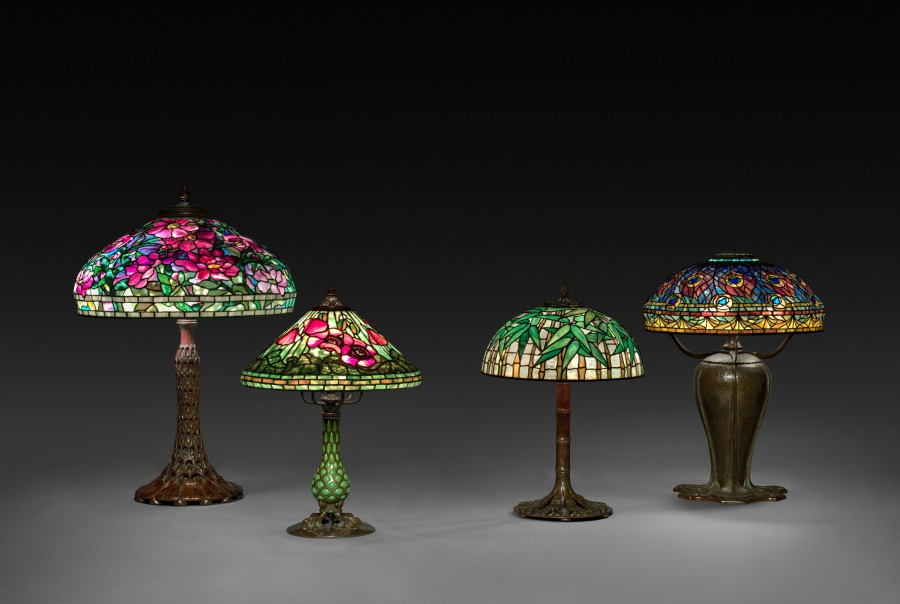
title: Poppy Filigree Table Lamp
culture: America, New York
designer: probably by Clara Wolcott Driscoll (American, 1861–1944)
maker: Tiffany Studios (United States, New York, 1902–32)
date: c.1902–10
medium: Leaded glass, blown glass, brass, bronze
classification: Lamp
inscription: Shade impressed: TIFFANY STUDIOS/NEW YORK/1431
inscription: Base impressed: TIFFANY STUDIOS/NEW YORK/28610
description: In the 1870s a renewed emphasis on natural landscapes ushered in a generation of cottage gardeners who delighted in planting perennials in large quantities. Louis Comfort Tiffany was among those who championed the lush, sometimes wild-looking displays of varied floral species in the garden at his Long Island estate, Laurelton Hall. Tiffany encouraged his designers to take inspiration from his garden by shipping fresh cuttings almost weekly to his studios. Ohio native Clara Wolcott Driscoll and her team of female designers created floral patterns for lamps and mosaics based on the colorful blooms of spring that became among the most sought after and commercially successful of Tiffany’s production.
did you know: Brass filigree layered over and underneath the glass in the Poppy lamp helps define its blossoms and leaves.